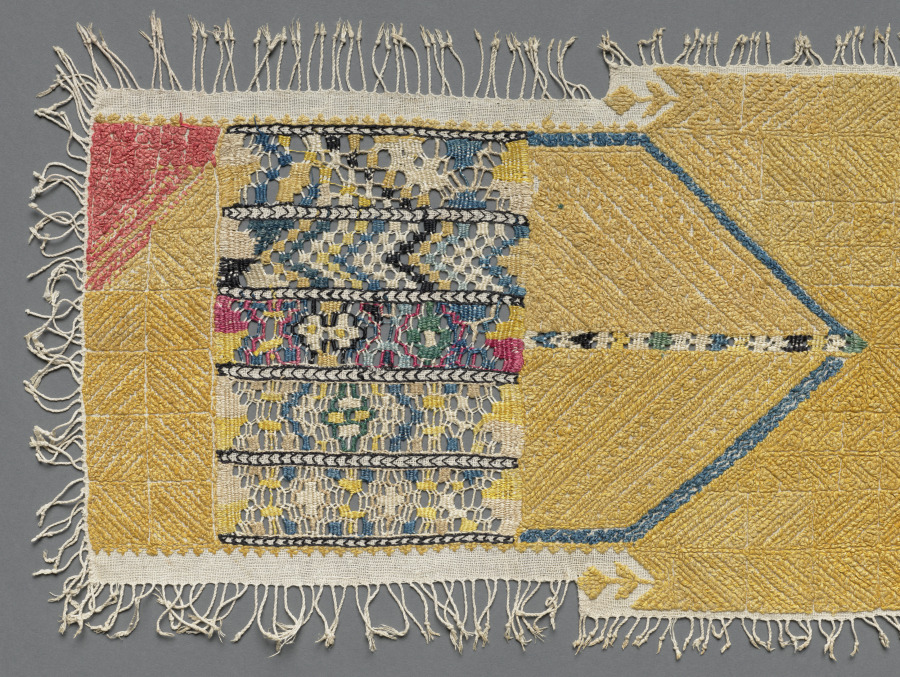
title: Furnishing textile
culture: Africa, North Africa, Morocco, Chefchaouen, Moroccan embroiderer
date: 1800s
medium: Linen, silk, dye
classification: Embroidery